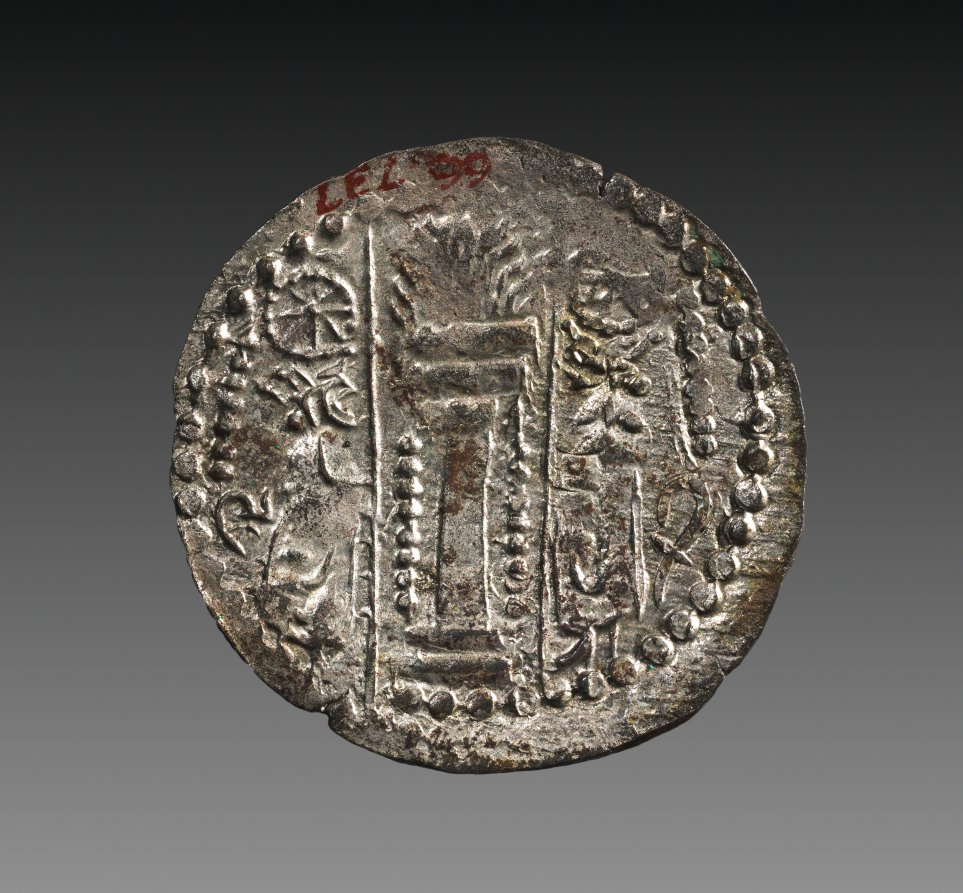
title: Drachm: Fire Altar, Male Attendants, Wheels (reverse)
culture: Hephtalite, minted in Afghanistan, reign of Napki Malka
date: c. 450–500 CE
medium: silver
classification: Coins